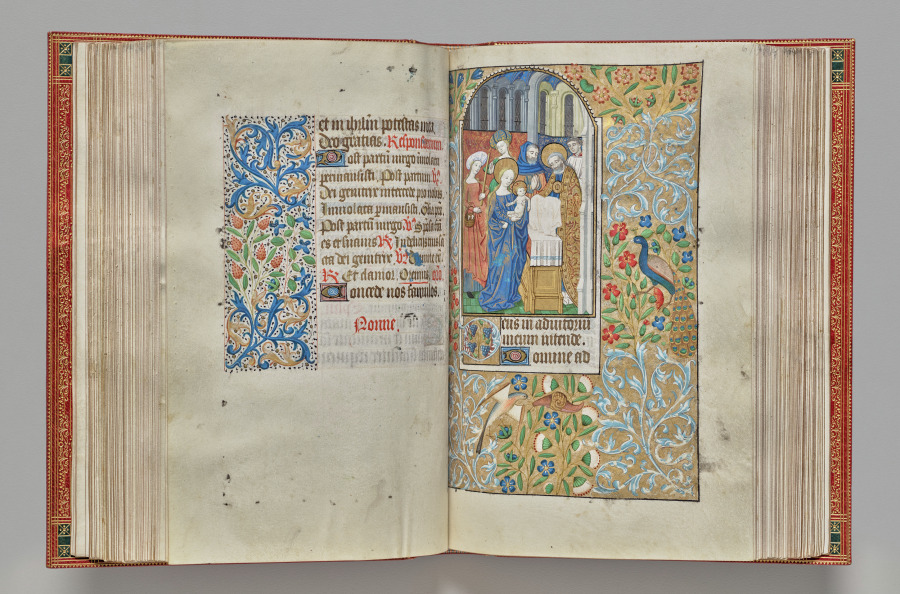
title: Book of Hours (Use of Rouen): fol. 66v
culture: France, Rouen, 15th century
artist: Master of the Geneva Latini (French, active Rouen, 1460–80)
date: c. 1470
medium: ink, tempera, and gold on vellum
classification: Bound Volume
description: In the late 1400s and early 1500s Rouen was an established and important center of book production. The city’s cathedral had a wealthy chapter that spent large sums of money to commission books and to maintain its extensive library. The stationers and booksellers would have likely been concentrated in or near the cathedral precinct. This artist, named after a manuscript now in Geneva, was Rouen’s principal illuminator during the second half of the 1400s.